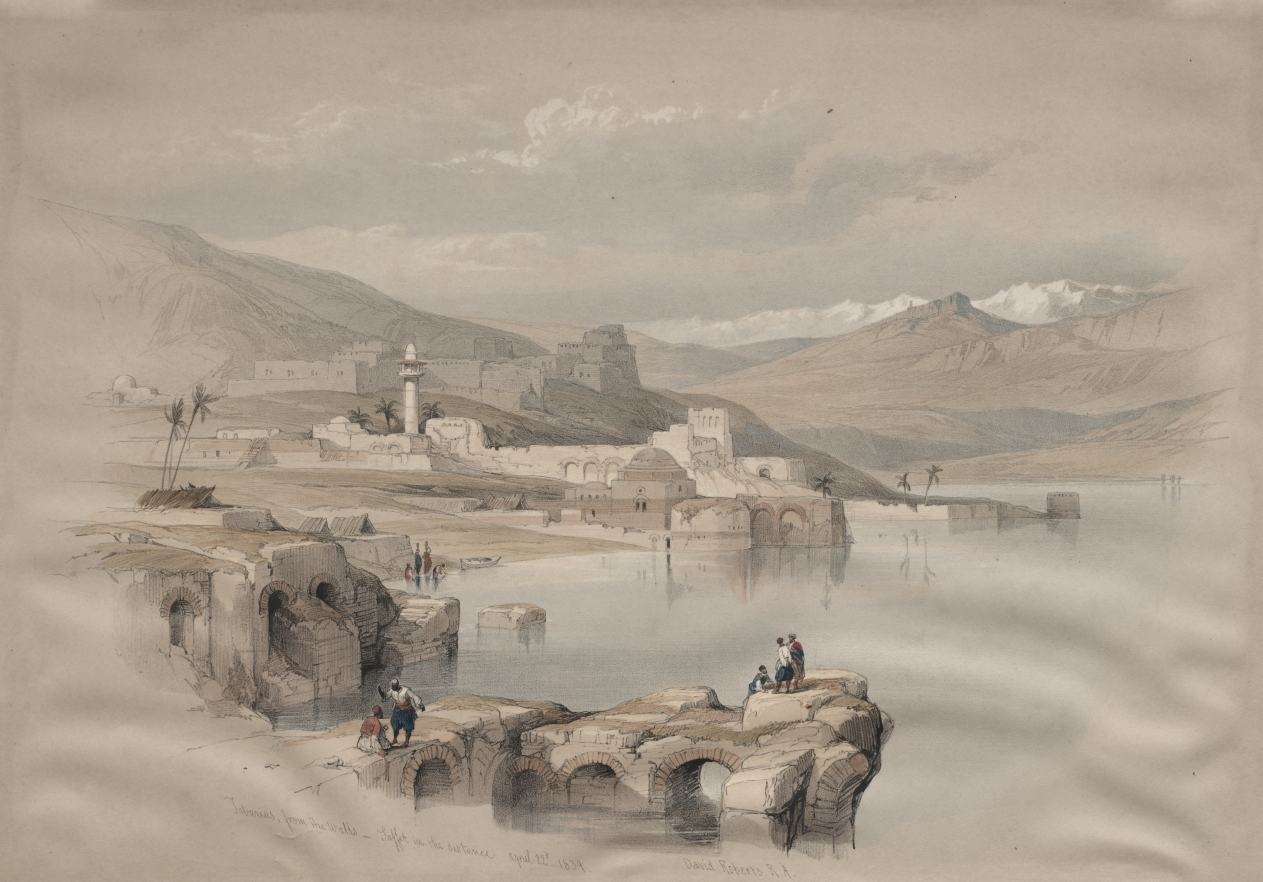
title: Tiberias, from the Walls, Safet in the Distance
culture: England, 19th century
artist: David Roberts (Scottish, 1796–1864)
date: 1839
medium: color lithograph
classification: Print